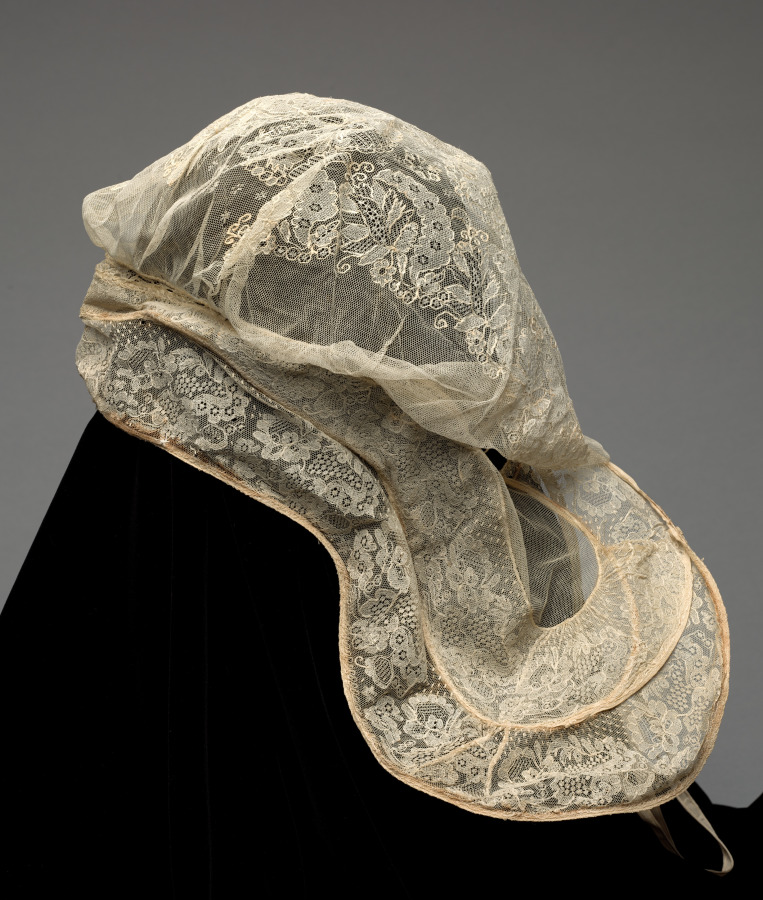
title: Lace Cap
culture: Netherlands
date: 1800s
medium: Net lace, embroidered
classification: Garment